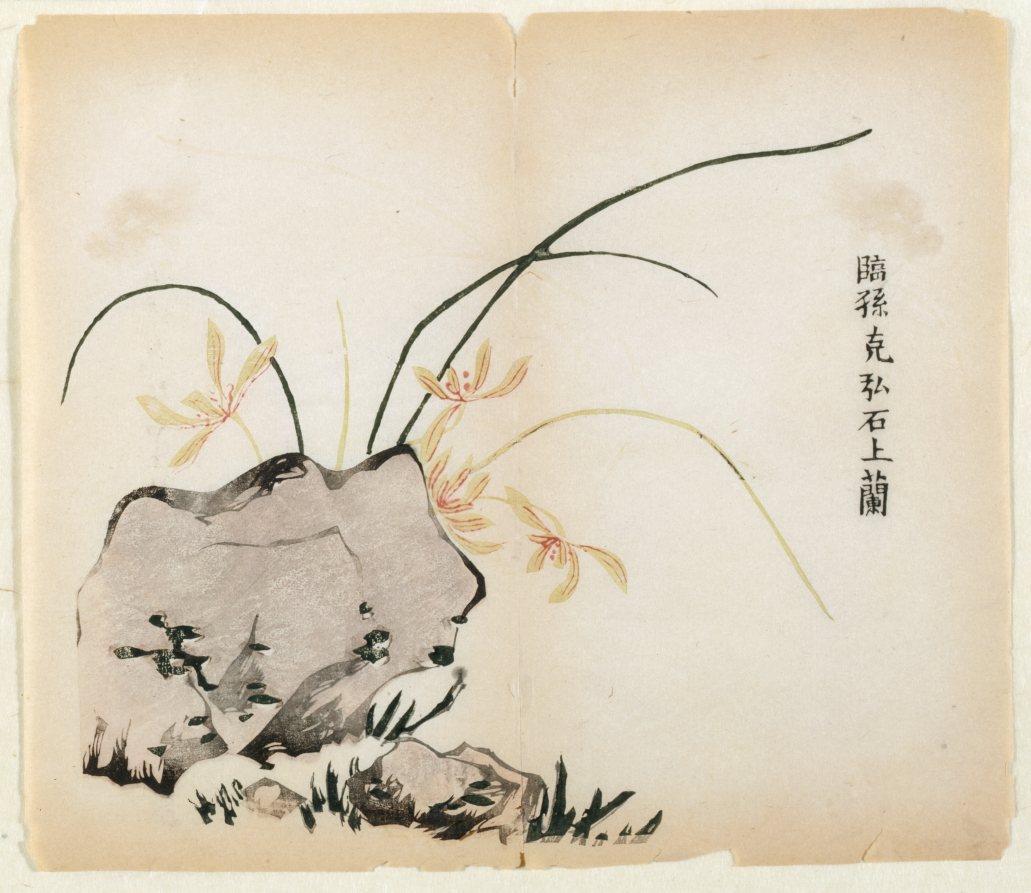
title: Orchid on Rocks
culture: China, Qing dynasty (1644-1911)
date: 1700s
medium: color woodblock print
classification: Print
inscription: 臨孫克弘石上蘭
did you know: This print is from the Mustard Seed Garden Painter's Manual.